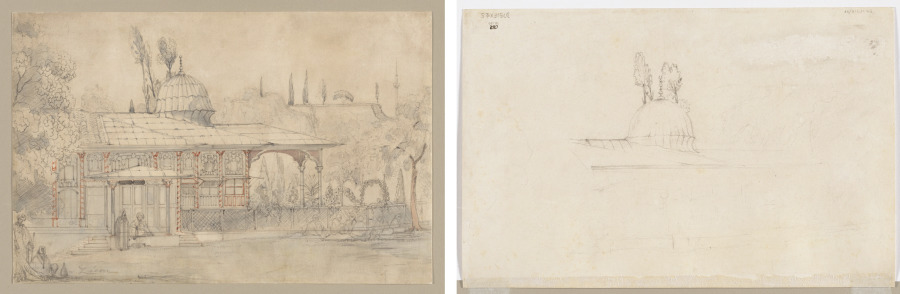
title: Pavilion Near a Mosque (recto) Sketch for Pavilion Near a Mosque (verso)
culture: France, 19th century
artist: Félix Ziem (French, 1821–1911)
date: 1800s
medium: graphite and gray, blue, orange and red wash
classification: Drawing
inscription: signed, lower left, in graphite: Ziem